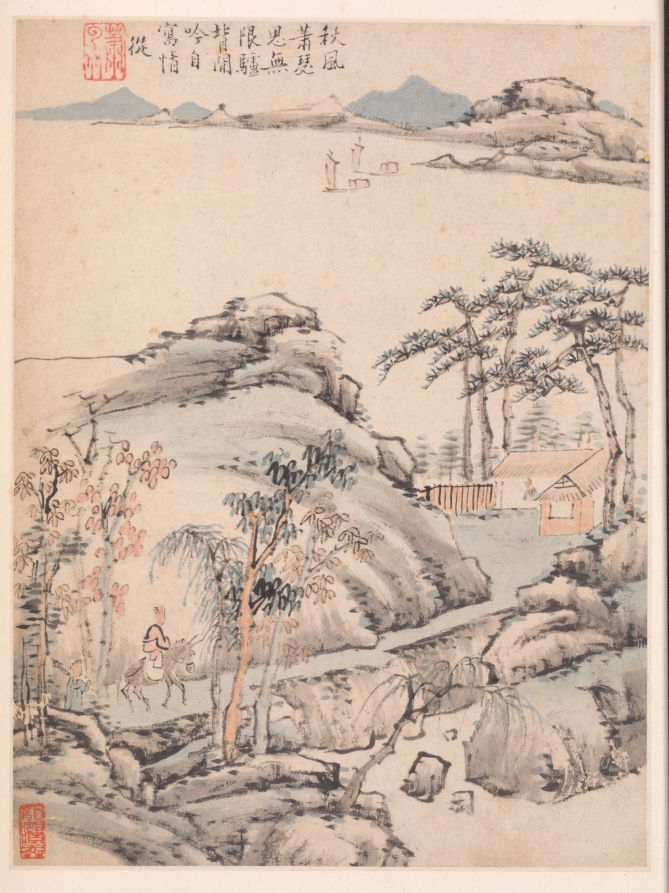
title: Album of Seasonal Landscapes, Leaf F (previous leaf 5)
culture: China, Qing dynasty (1644–1911)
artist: Xiao Yuncong (Chinese, 1596–1673)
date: 1668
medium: album leaf; ink and light color on paper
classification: Painting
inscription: Artist's inscription, signature, and 8 seals: Leaf E. In the autumn wind's lonely soughing,/ My thoughts are without limits./ Humming on the back of a donkey;/ I write down my feelings. Yuncong [seal] Xiao Yuncong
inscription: 9 additional seals: 2 of Chen Yixi 陳奕禧 (1646-1709); 4 of Li Yufen 李玉棻 [Li Yunhu 李韵湖] (active mid-1800s); 3 unidentified.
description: Throughout his lifetime, Xiao Yuncong visited Nanjing and Yangzhou, cities embedded in the fertile and water-rich Jiangnan region, as reflected in his paintings. Xiao painted from nature, and his landscapes are informed by the seasons and his travels, as well as by his experience as a print designer. Xiao’s fresh, light colors continue to appear in later Shanghai school paintings. This album was formerly in the collection of Li Yufen in Yangzhou and then owned by Wu Hufan in Shanghai. While the artist impressed his seal consistently below his poetic inscriptions in the upper parts of the composition, the red seals on the margins and in the lower corners of the paintings are impressions by the album’s previous owners.